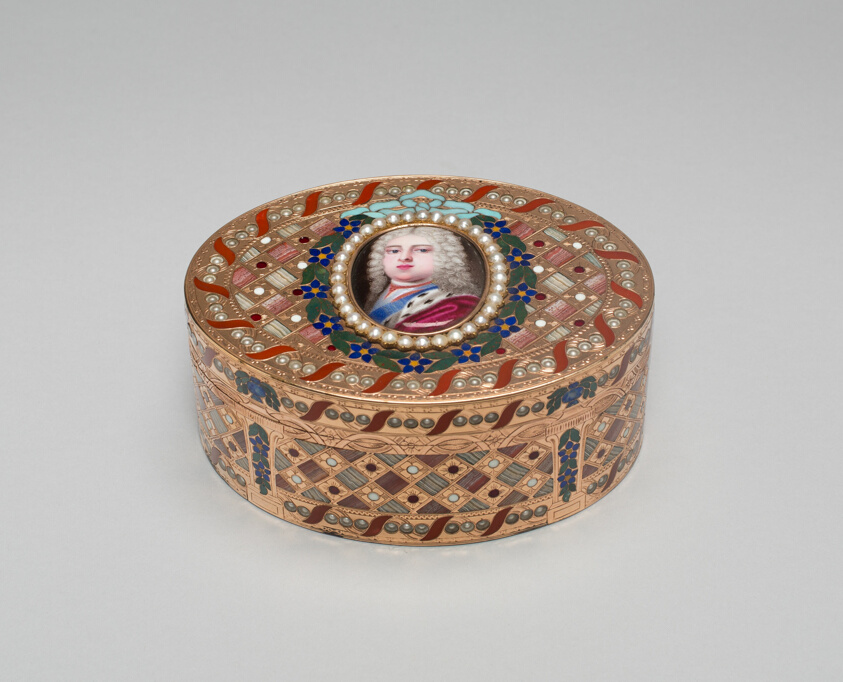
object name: Metalwork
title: Snuff Box: Portrait of Saxon Prince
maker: Johann Christian Neuber; German, 1735-1808; Dresden, Germany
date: c. 1775/80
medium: Gold, hardstone, enamel, copper, glass, and pearls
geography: Dresden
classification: snuff box; european decorative arts; metalwork